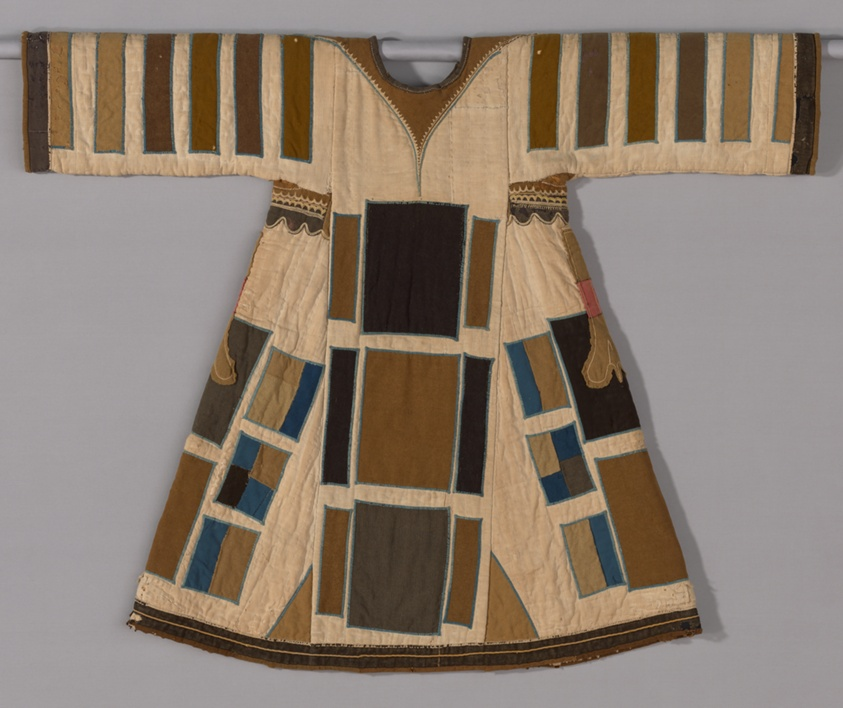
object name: Costume and Accessories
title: Tunic (Jibbeh)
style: Arts of Africa, 19th century, east african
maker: Mahdiyya State, Sudan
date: 1885/99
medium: Layers of cotton, plain weave; pieced and quilted; appliquéd with wool and wool and cotton plain weaves and wool twill weaves; embroidered with cotton in chain, cross, and a derivative of herringbone stitches; applied plied yarn edging; lined with cotton plain weaves; pieced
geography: Sudan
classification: tunic; arts of Africa; costume; garment; textile; dress (garment)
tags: garment, rectangles, black (color), tan (color), brown (color), lines, colonialism, Freedom, military, military uniforms, soldiers, uniforms